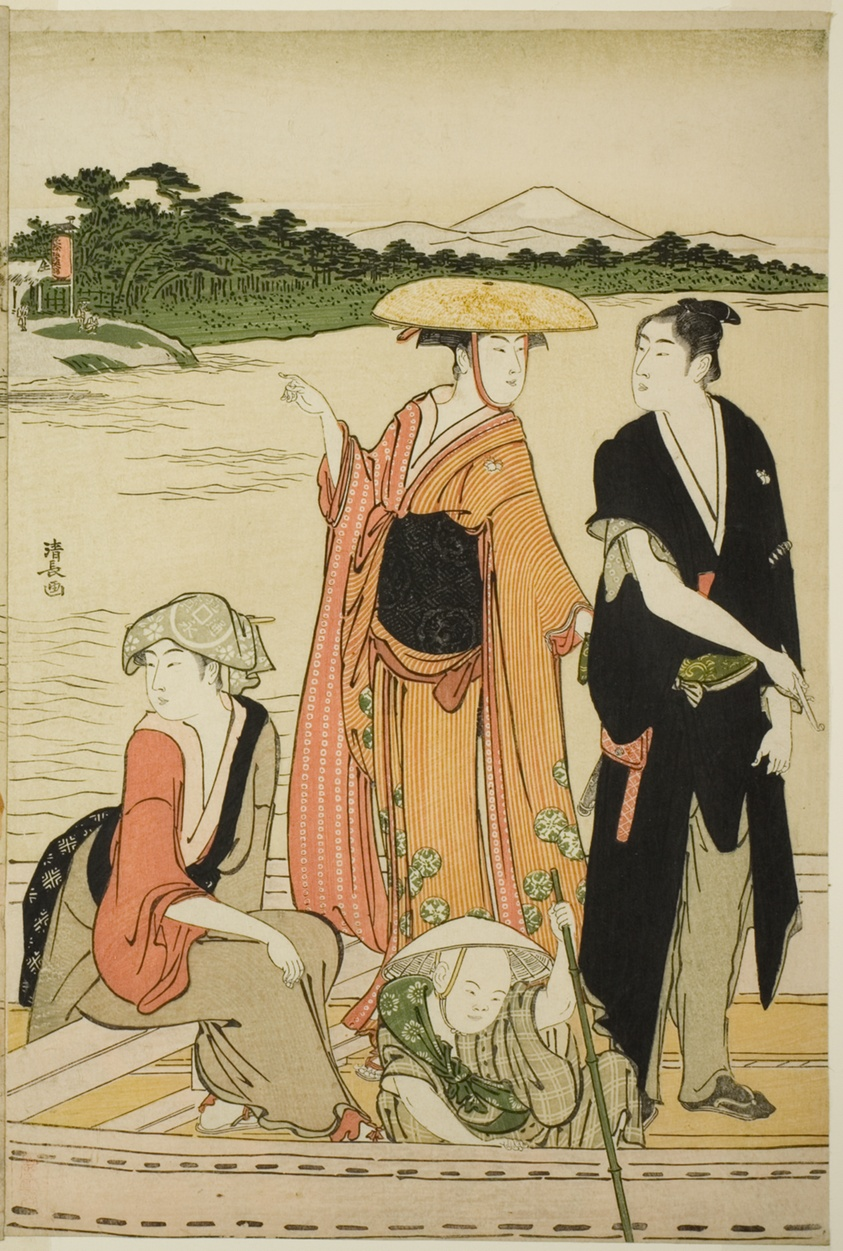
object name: Print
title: Ferry on the Rokugo River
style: Japanese (culture or style)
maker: Torii Kiyonaga (Japanese, 1752-1815)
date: c. 1784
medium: Color woodblock print; right sheet of oban diptych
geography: Japan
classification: woodblock print; print; asian art